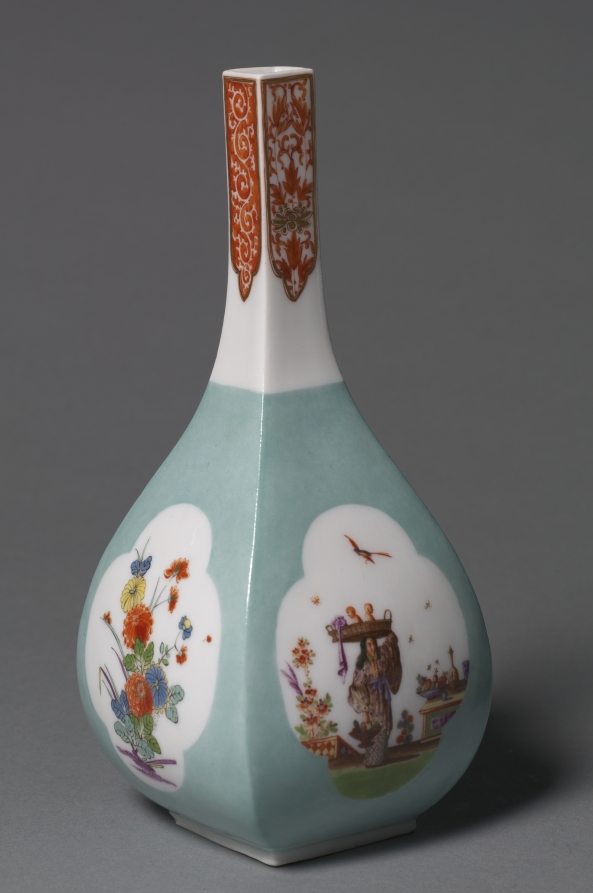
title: Saki Bottle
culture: Germany, Meissen, 18th century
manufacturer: Meissen Porcelain Factory (German, est. c. 1710)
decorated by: probably by Johann Gregor Herold (German, 1696–1775)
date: c. 1730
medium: porcelain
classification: Ceramic